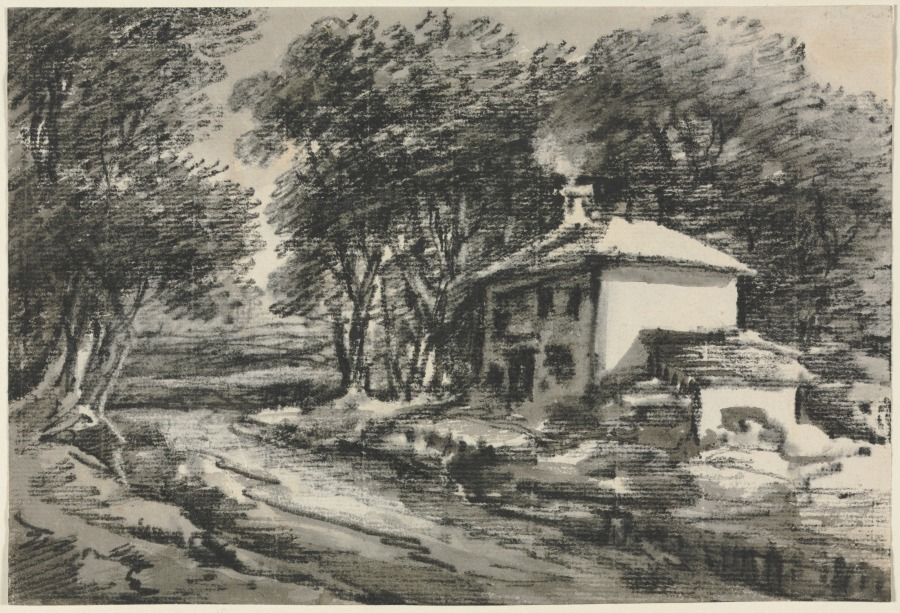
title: Landscape with Cottage (recto); Studies of Heads (verso)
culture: England, 18th century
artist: Thomas Monro (British, 1759–1833)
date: c. 1820s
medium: black chalk and gray wash with scraping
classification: Drawing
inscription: verso, in graphite: A 16477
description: Dr. Thomas Monro is best known as a patron who exercised significant influence in the London art world in the late 18th and early 19th centuries, but he was also an amateur artist and competent follower of Thomas Gainsborough. The physician’s drawings were monochromatic, done in wash with additions of charcoal, chalk, or india ink in emulation of Gainsborough’s moody rural views. On the verso of the drawing is a mise-en-page of caricatures and a hillside—perhaps whimsically drawn by multiple artists at one of the doctor’s salons.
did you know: Dr. Thomas Monro established what became known as an "Academy," where artists gathered in the evenings to draw, at his home overlooking the Thames.